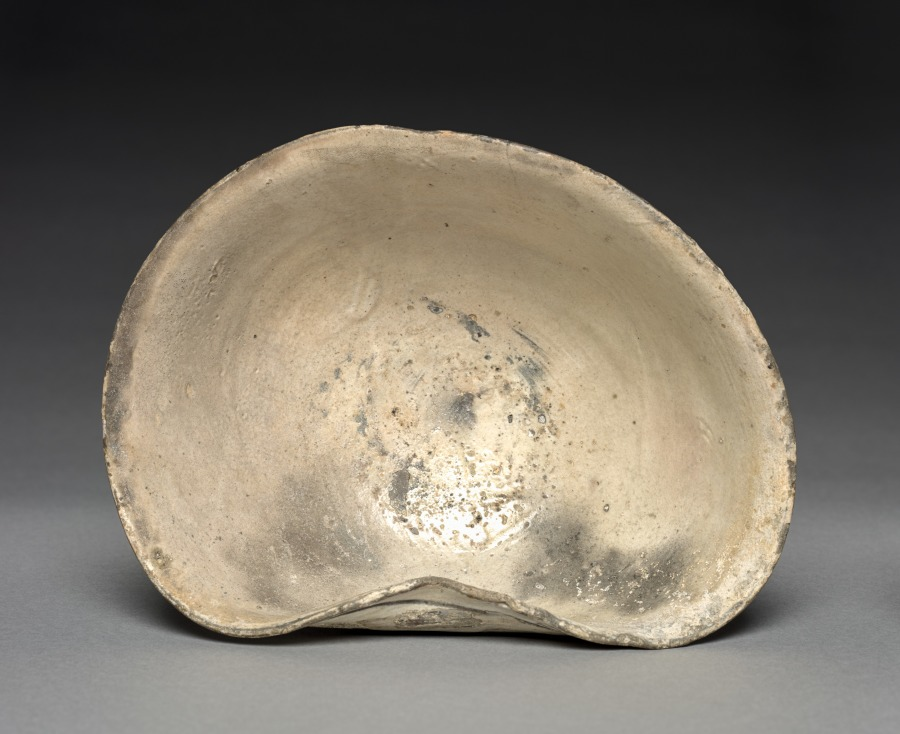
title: Bowl with Brushing Decorations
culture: Korea, Joseon dynasty (1392–1910)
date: 1400s–1500s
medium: Clay, glaze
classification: Ceramic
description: This type of wide-mouthed bowl was used everyday in Korea, not exclusively for tea drinking. But when it was introduced to Japan around the early 1500s, its imperfect appearance evoking the aesthetics of wabi-sabi caused it to be repurposed as a tea bowl. Korean tea bowls were circulated as an item of foreign luxury among Japanese military elites. Many Korean potters were abducted to Japan during the Japanese invasions (1592–98) and some settled down in provinces such as in the Saga prefecture in Kyushu. Dislocated Korean potters are often credited for their leading role in the development of ceramic industry in Japan.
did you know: This type of humble tea bowl was highly praised among Japanese collectors for its imperfect beauty.